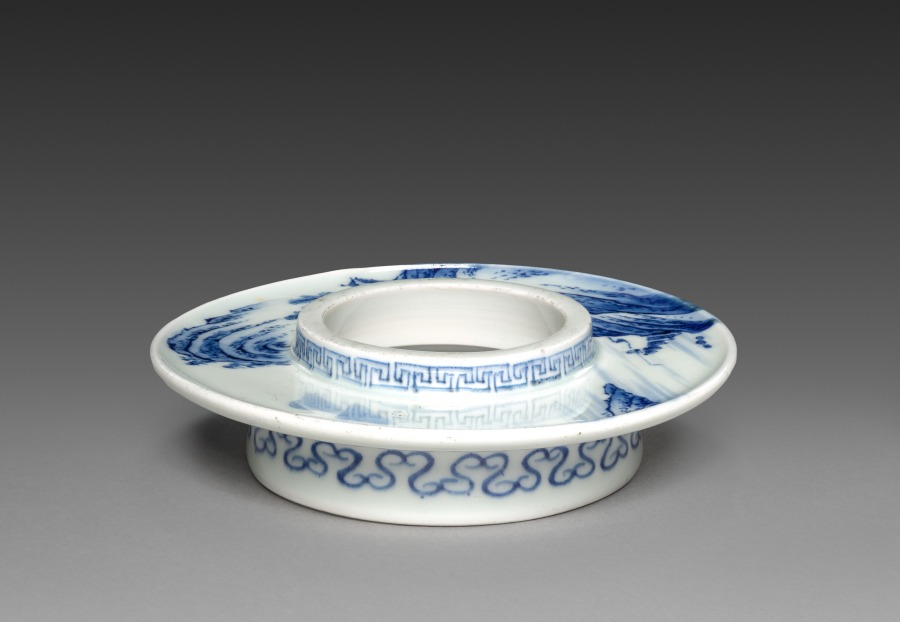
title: Cup Holder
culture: Japan, Edo period (1615–1868)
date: early to mid-1800s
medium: porcelain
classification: Ceramic